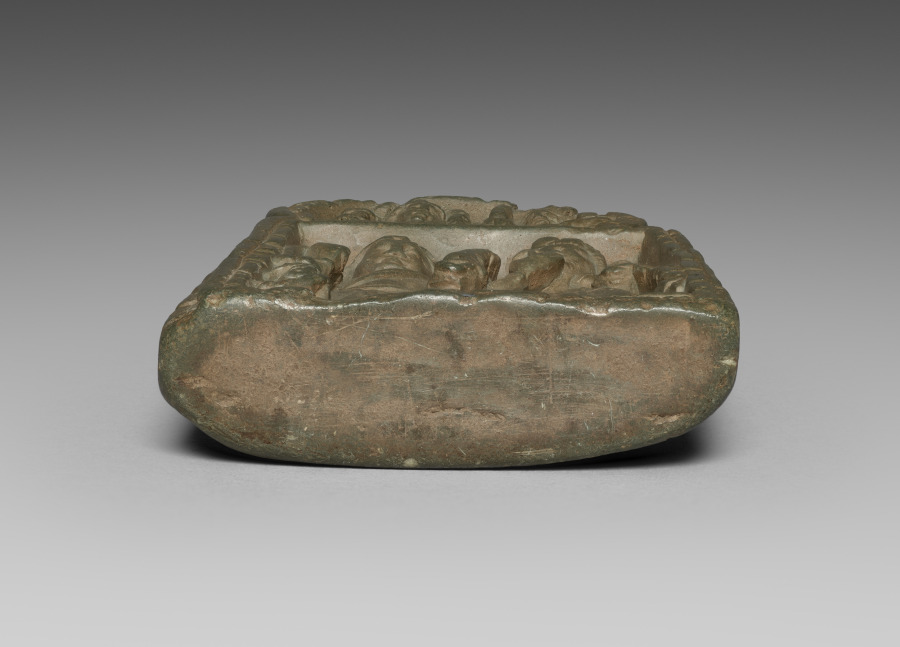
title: Section from a Portable Shrine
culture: Pakistan, Gandhara, Kushan period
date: 100s CE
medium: gray schist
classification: Sculpture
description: Figures of deities who protect children are featured in this relief carving. A form of Skanda holding a bird and a flower stands next to a regal yakshi with pointed rodent or elephant ears. A diminutive figure who may be a child is shown kneeling at his feet. Above, the six-headed mother goddess Shashthi sits next to Skanda, holding the spear.